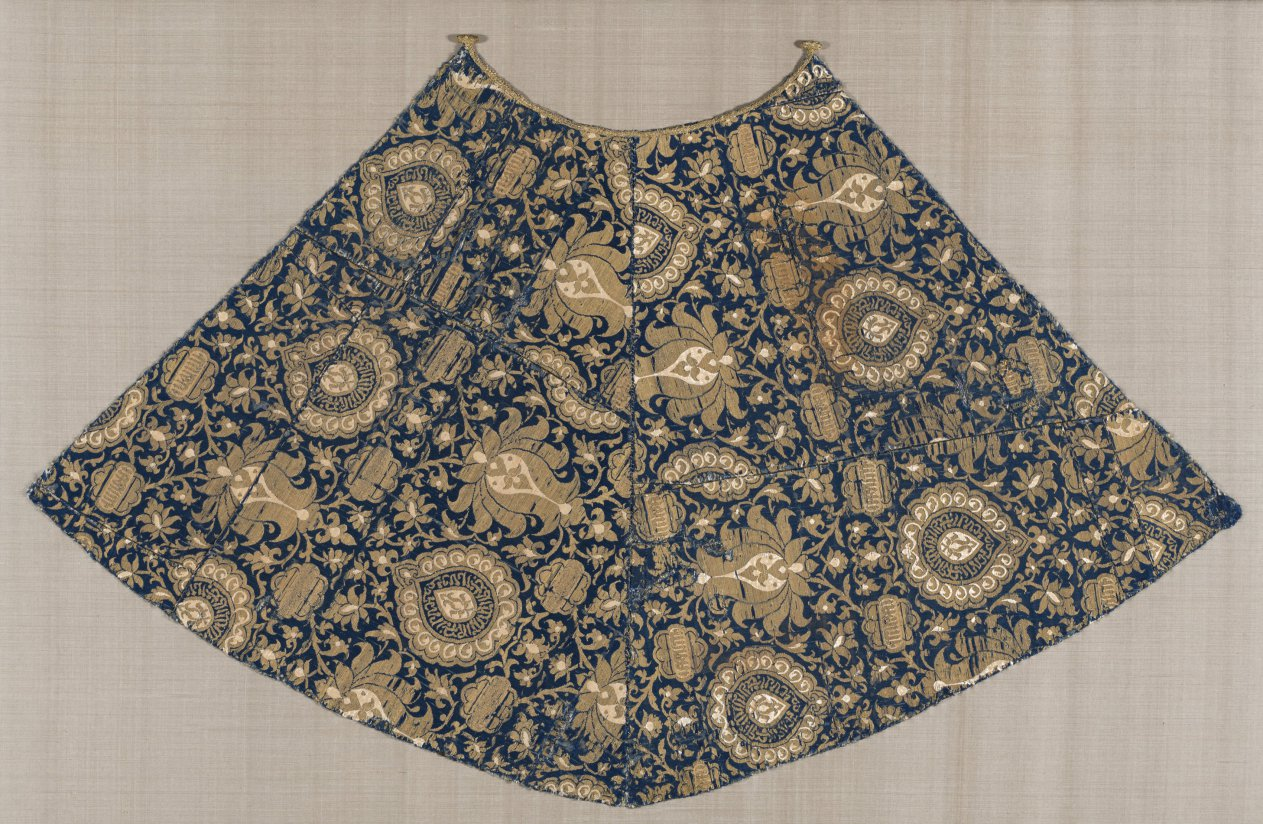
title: Mantle for a Statue of the Virgin with Lotus Blossoms and Medallions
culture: Egypt and Spain; Egypt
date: c. 1430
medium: Silk and gilt-metal thread: lampas weave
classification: Textile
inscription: Glory to our master, the sultan, the king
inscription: The sultan, the king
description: This costly royal silk with extensive gold thread was woven in Egypt and gifted or exported to Spain, where it was pieced into this mantle for a statue of the Virgin, probably to be worn during festivals and processions. The sturdy silk brocade foundation cloth was also woven with a lighter weight silk damask with a repeating mirror image. Therefore, the Arabic inscription in the medallions reads both forward and backward: Glory to our master, the sultan, the king. The inscribed lobed roundels say The sultan, the king.